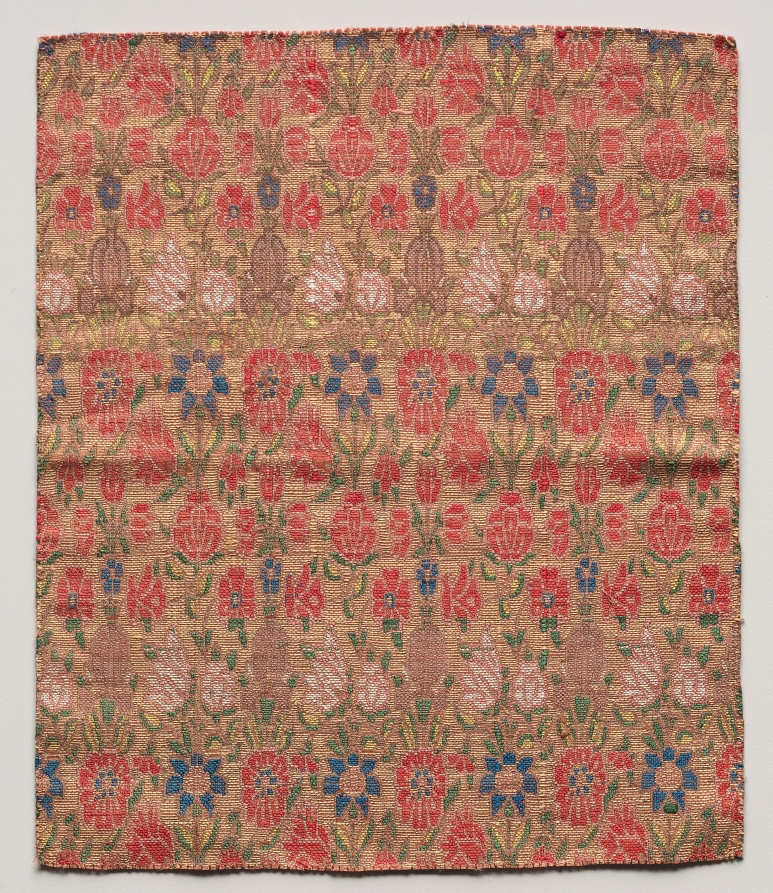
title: Fragment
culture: Iran, 18th century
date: 1700s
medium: lampas weave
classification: Textile